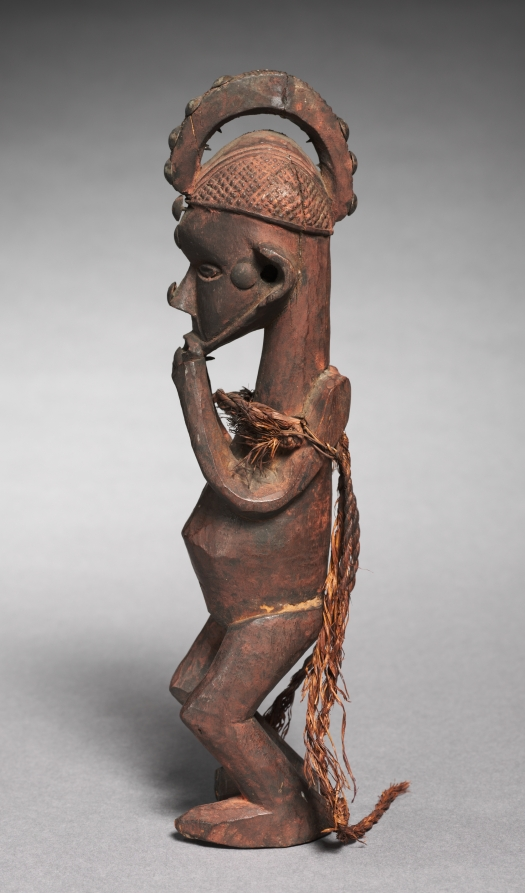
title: Male Figure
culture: Central Africa, Democratic Republic of the Congo, Suku, early 20th century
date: early 1900s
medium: Wood, upholstery studs, and plant fiber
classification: Sculpture